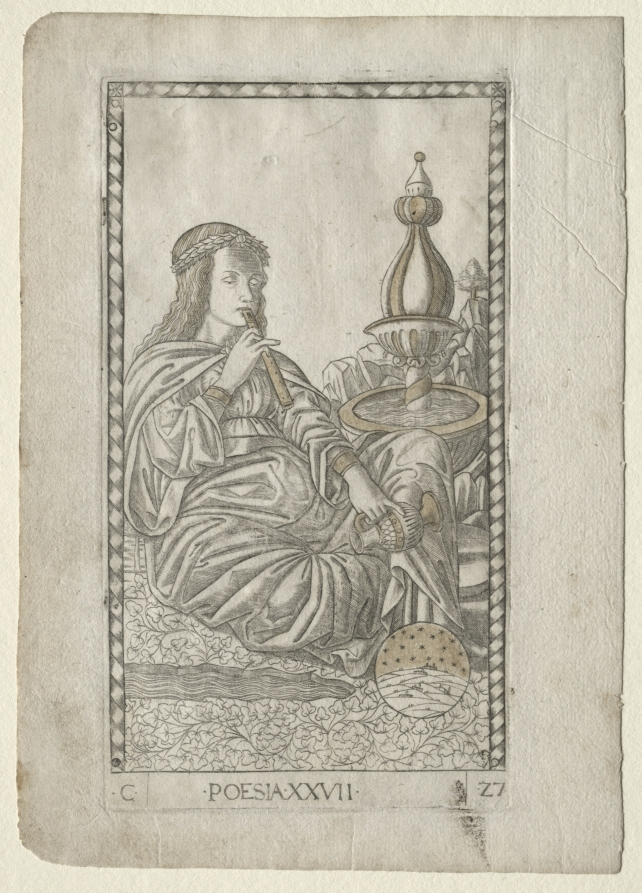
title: Poetry (from the Tarocchi, series C: Liberal Arts, #27)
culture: Italy, Ferrara, 15th century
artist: Master of the E-Series Tarocchi (Italian, active 1460s)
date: before 1467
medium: engraving, hand-colored with gold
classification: Print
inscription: Lettered below the image of Poesia (Poetry): ·C· / · POESIA· XXVII· / ·27·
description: This engraving is part of the group “C” named Liberal Arts. Conceptually, the liberal arts descended from classical antiquity, and were divided into the Trivium (Grammar, Rhetoric, and Dialectic or Logic) and the Quadrivium (Music, Geometry, Arithmetic, and Astronomy). In the Tarocchi set the total number was risen to ten, with the addition of the three disciplines (Poetry, Philosophy, and Theology). The liberal arts denoted knowledge or skills considered necessary to participate in a free society. By the late Middle Ages, they began to be represented in the visual arts as womanlike allegories. Here, Poesia (Poetry) is personified as as a young female figure crowned with a laurel wreath. She is seated in front of Mount Parnassus, next to a fountain. This latter exemplifies the Greek Castalian font, believed by poets to be a source of inspiration. While playing the flute—a symbol of eloquence—Poetry irrigates the earth with inspirational waters taken from the Castalian spring.